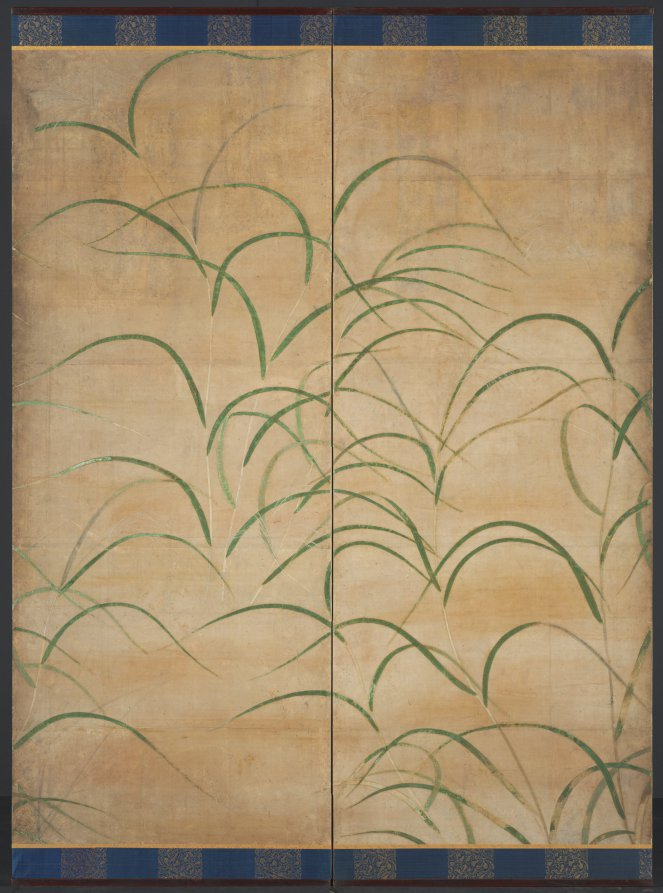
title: Susuki Grass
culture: Japan, Muromachi period (1392–1573)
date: c. 1525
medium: One of a pair of six-panel folding screens; ink, color, and gold on paper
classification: Painting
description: Susuki grass has a seasonal association with autumn in the Japanese visual and literary tradition. It is one of the “Seven Flowers of Autumn,” along with bush clover, arrowroot, pink, patrinia, mistflower, and bellflower. This composition immerses the beholder in a field of grasses and golden bands of mist. The design may have served as a backdrop for poems brushed in ink on decorated papers and attached to the surface of the screens, a practice with a long tradition in Japan.